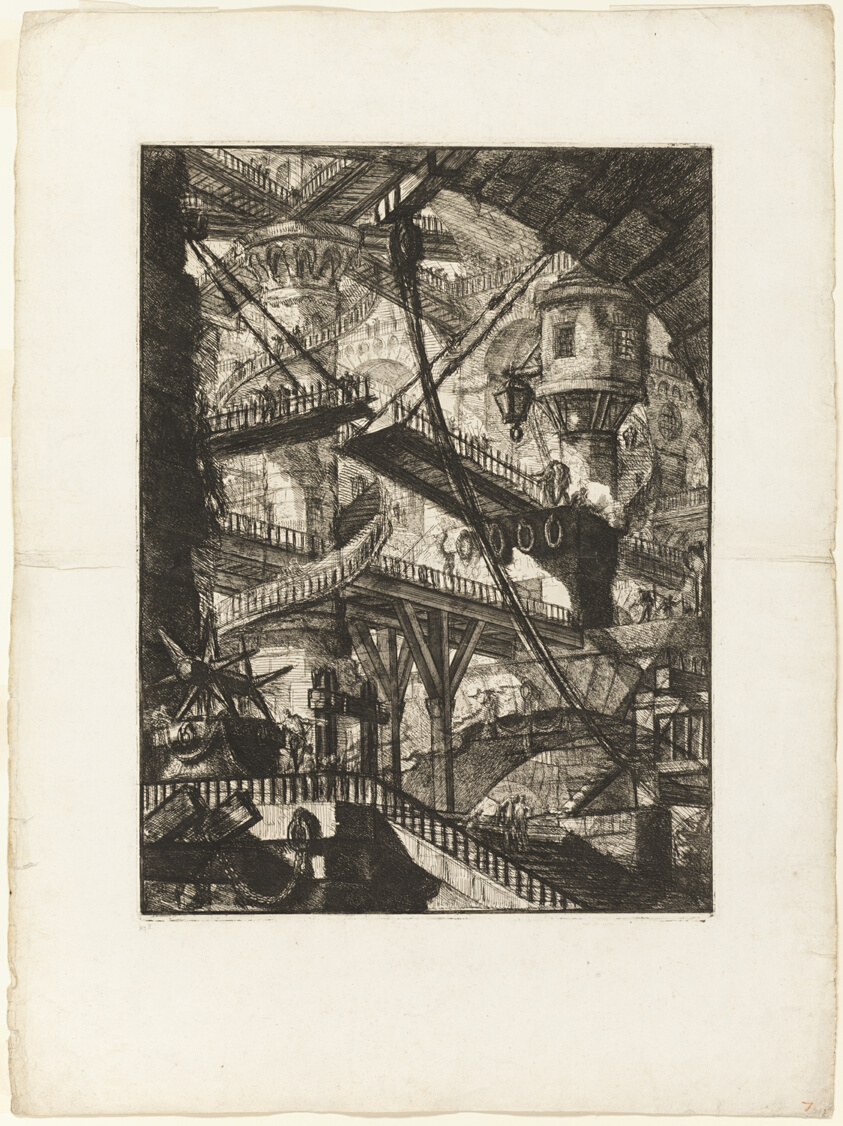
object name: Print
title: The Drawbridge, plate 7 from Imaginary Prisons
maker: Giovanni Battista Piranesi (Italian, 1720-1778)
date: 1761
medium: Etching and engraving on heavy ivory laid paper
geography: Italy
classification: etching; print; prints and drawing